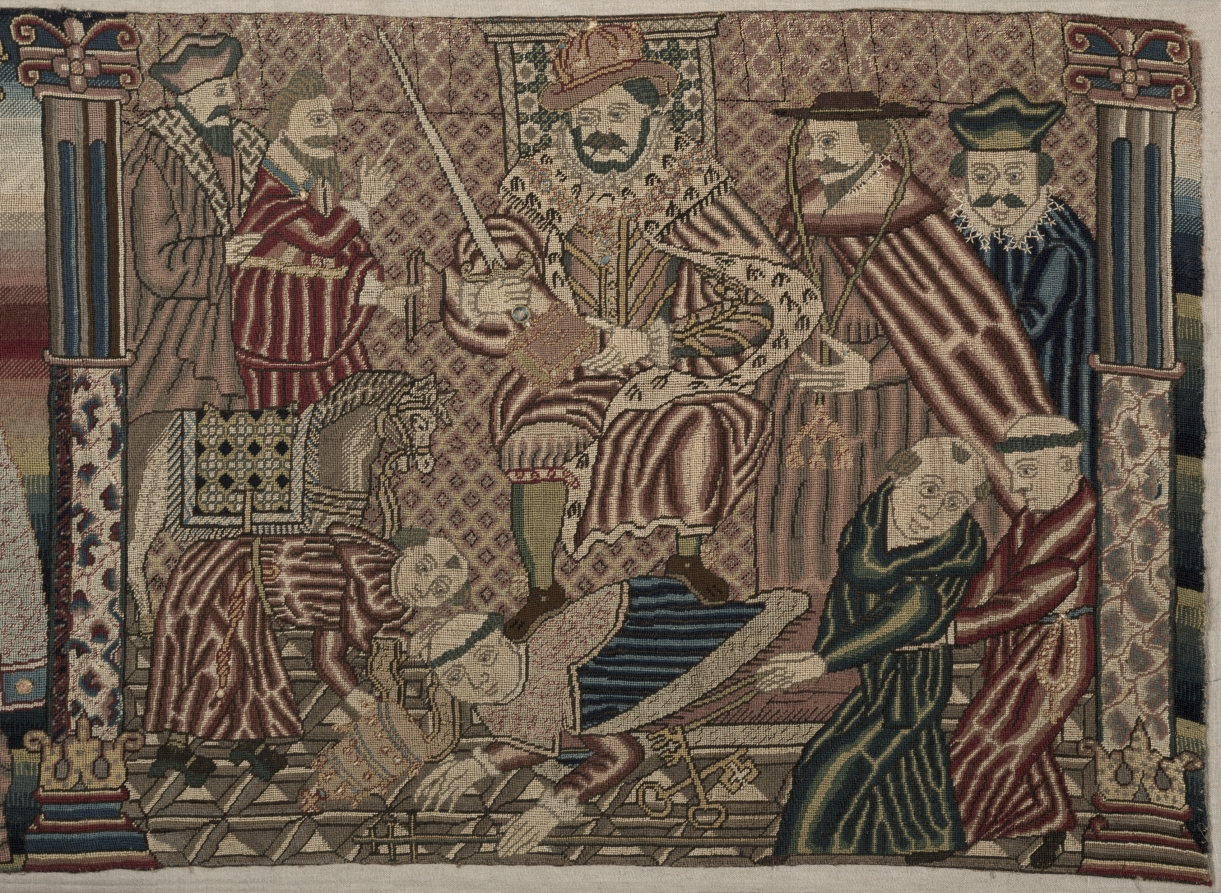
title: Section of an Embroidered Frieze: Ahasuerus and Esther, The Pope Chiding the Emperor, Henry VIII treading on the Pope's Neck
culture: England, Period of Charles I (1625-1649), 17th century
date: 1625–1649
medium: petit-point embroidery; wool and silk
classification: Embroidery